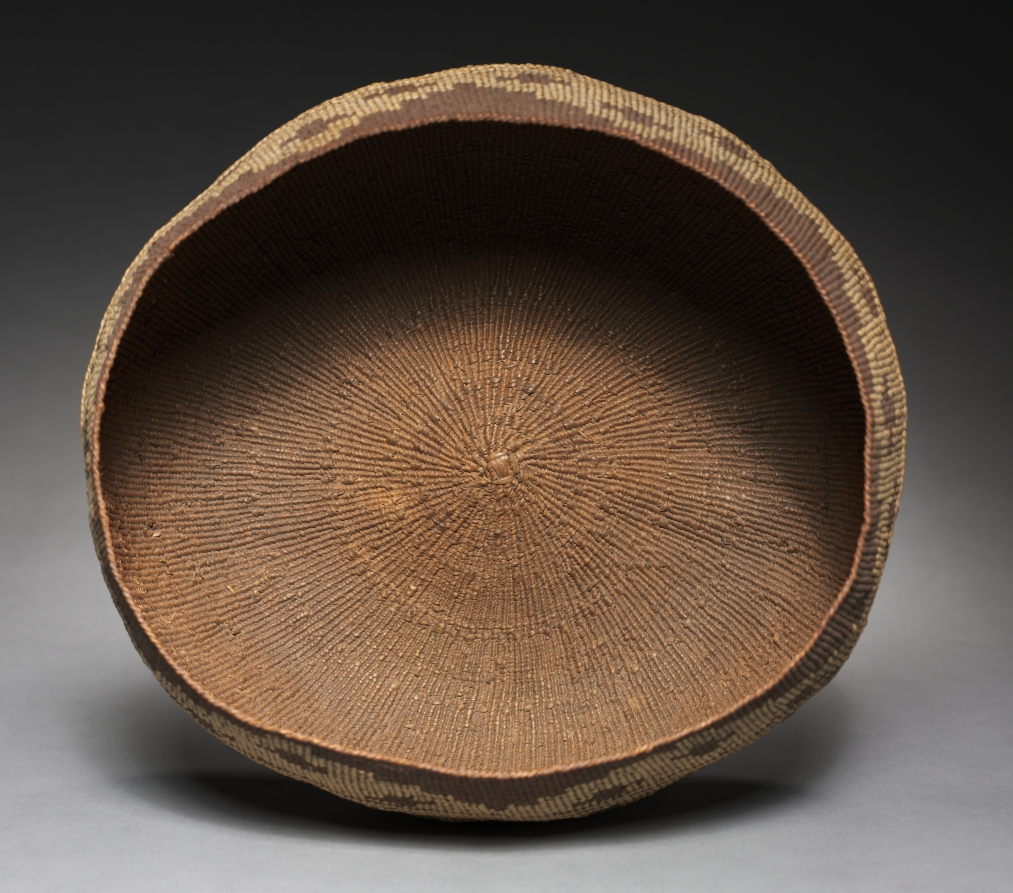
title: Cooking Bowl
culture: California, Karok or Hupa, Unassigned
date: Unassigned, before 1942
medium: twined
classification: Basketry